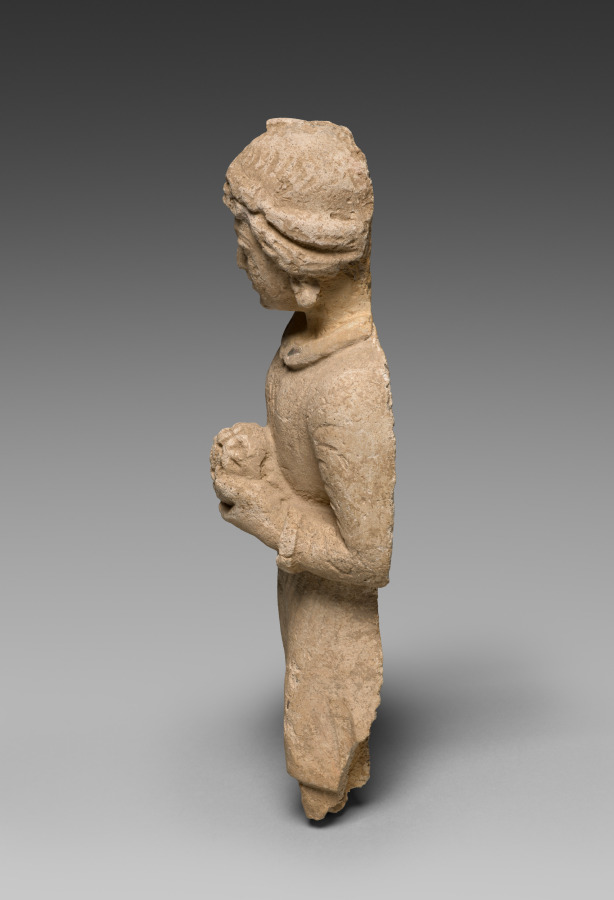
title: Layman bearing offerings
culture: Afghanistan, Hadda, probably Tape Shotor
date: c. 300 CE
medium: stucco with mother-of-pearl inlay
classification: Sculpture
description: The Buddhist monasteries at Hadda were famous internationally until their destruction by fire in the 800s CE. One thousand years later, a British explorer named Charles Masson (1800–1853) documented the site and collected many sculptures from the ruins that are now in the British Museum in London. French archaeologists carried out systematic excavations between 1926 and 1929. They brought many sculptures to the National Museum of Asian Art, Guimet, in Paris. Some sculptures entered other museum and private collections around the world. In the 1970s, Afghan archaeologists continued to document the Buddhist sites of Hadda and brought many more sculptures to the National Museum of Afghanistan in Kabul.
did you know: The Buddhist community (sangha) consists of both monks and laypeople who brought wealth to support the monasteries at Hadda.